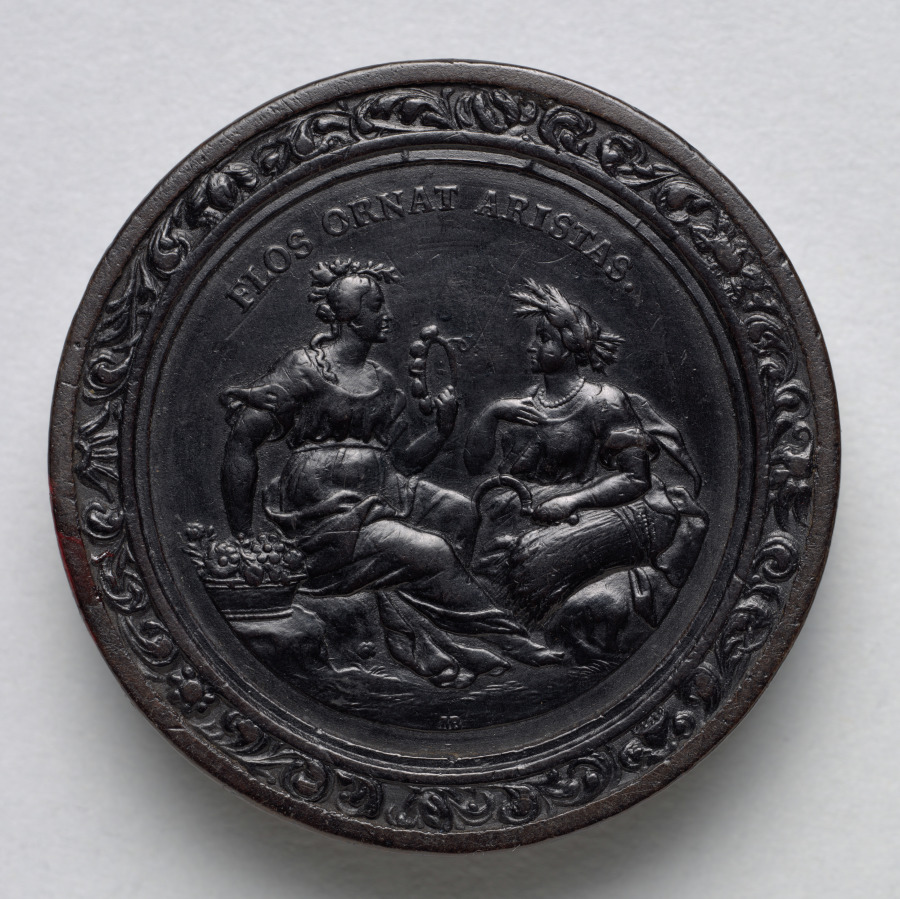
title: Gaming Piece (reverse)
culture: Germany, late 17th-early 18th Century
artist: Martin Brunner (German, 1659–1725)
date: c.1700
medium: wood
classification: Furniture and woodwork